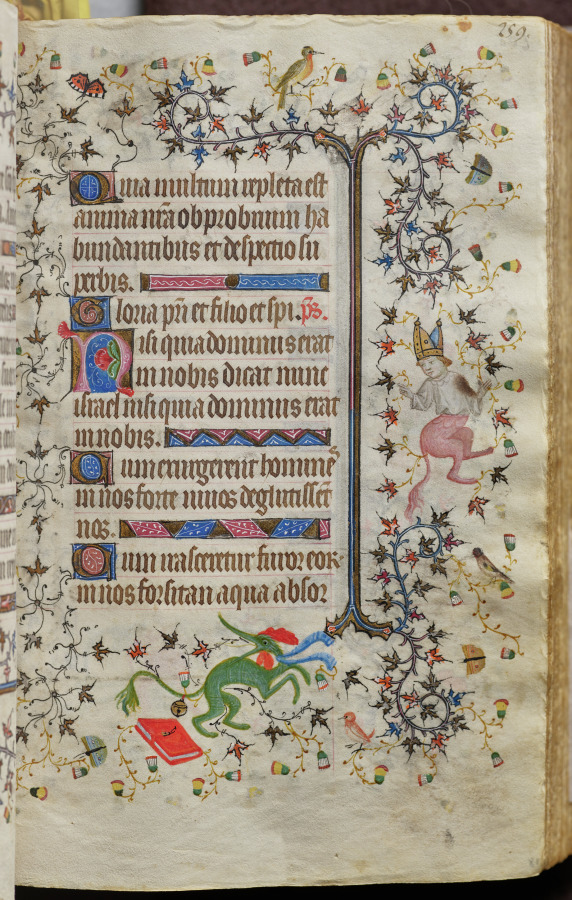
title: Hours of Charles the Noble, King of Navarre (1361-1425): fol. 80r, Text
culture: France, Paris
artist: Master of the Brussels Initials and Associates (French)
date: c. 1405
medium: ink, tempera, and gold on vellum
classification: Bound Volume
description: This precious volume was obviously highly prized by its owner, the French-born King of Navarre, who had his coat of arms painted on no less than twenty folios. Rather than directly commissioning this manuscript from a specific workshop, it seems that Charles the Noble acquired his book of hours -- perhaps ready-made for the luxury market -- while on a trip to Paris in 1404-05. A collaborative effort, six painting styles are evidenced within the pages of this codex, those of two Italians, two Frenchmen, and two Netherlanders. The painter who was responsible for the planning and decoration of the book, and who produced seventeen of the large miniatures, was a Bolognese artist known as the Master of the Brussels Initials. His principal assistant, responsible for most of the borders, was a Florentine who signed his name "Zecho" da Firenze on folio 208 verso.